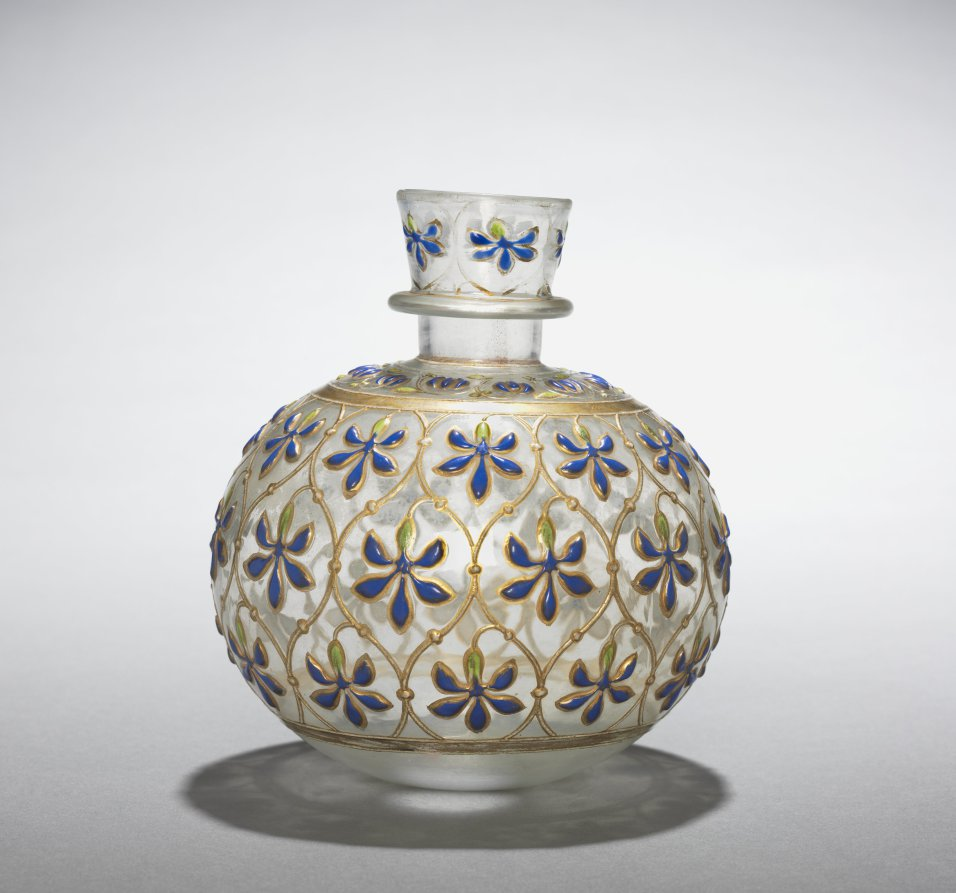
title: Hookah Base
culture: India, Mughal Dynasty (1526-1756)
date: early 1700s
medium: Glass with colored enamel and gilding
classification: Glass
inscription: Translation of inscription: "In the name of God, the element, the merciful, Is the key to the wise treasure"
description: Smoking tobacco was introduced to the Mughal court from Iran in the very early 1600s and soon became popular. This base formed part of a hookah, or water pipe, which consisted of a base that held water—sometimes perfumed with herbs or fresh fruit—a detachable bowl to hold tobacco, and a long tube. Early hookahs used existing vessels for bases, including coconut shells. By the late 1600s or early 1700s, richly decorated pieces like this were produced. The jewel-like decoration of blue and green blossoms evokes a garden in which a smoker might have sat.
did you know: Turquoise five-petaled flowers hang from lime green pedicels.